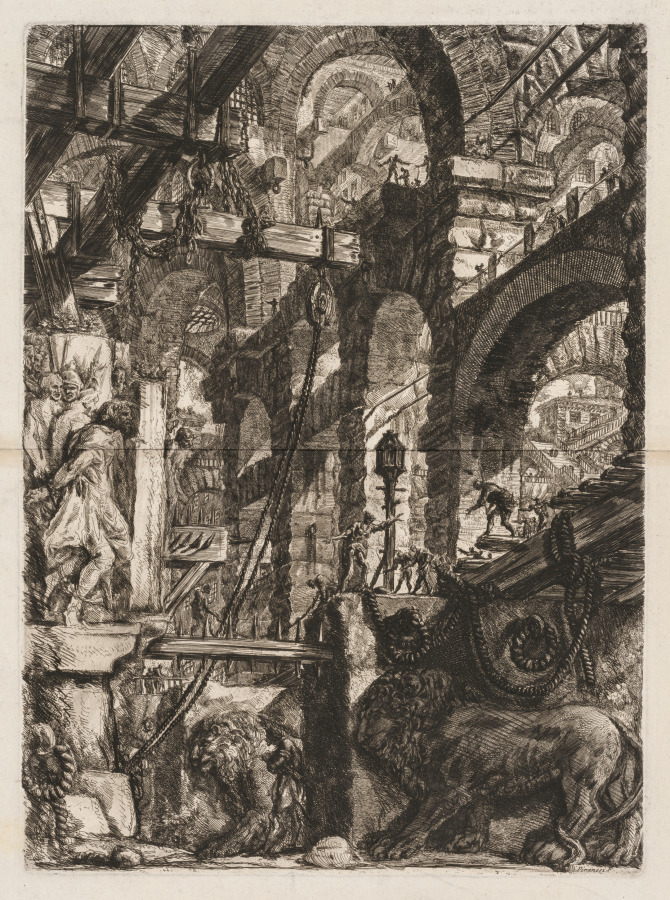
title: The Prisons: A Perspective of Roman Arches, with Two Lions Carved in Relief on Stone Slabs in the Foreground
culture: Italy, 18th century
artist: Giovanni Battista Piranesi (Italian, 1720–1778)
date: 1745–50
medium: etching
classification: Print